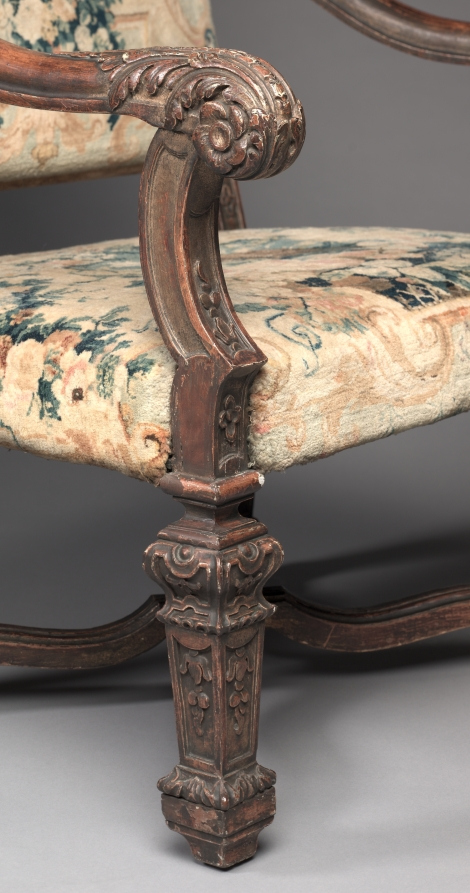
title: Armchair (2 of 4)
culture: France, 18th century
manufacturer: Royal Savonnerie Manufactory, Chaillot Workshops (French, est. 1627)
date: before 1717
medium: carved wood, Savonnerie knotted-pile (symmertrical rug knot) upholstery; wool, hemp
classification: Furniture and woodwork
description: These chairs belong to a suite that includes a settee (also in the CMA’s collection) and a tapestry made for a count and countess to mark their wedding in 1717. Furniture of this scale was usually placed against the wall in grand reception halls, more as a display of wealth than for use. Upholstered in Savonnerie tapestries, this suite was among the most treasured and expensive example anyone could own and typically reserved for royalty. To add decorative and intellectual interest to the textiles, weavers incorporated symbols depicting various stories from the Fables of Jean de La Fontaine, published from 1668 to 1694 and largely adapted from Aesop and other early storytellers.